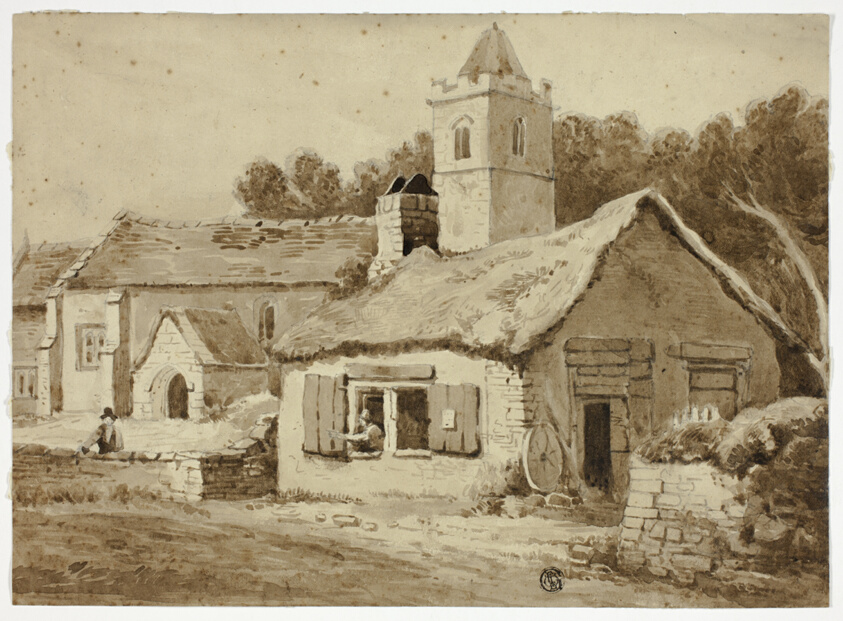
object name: Drawing and Watercolor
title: Village Church and Street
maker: After Samuel Prout; English, 1783-1852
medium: Brush and brown wash, with graphite, on tan wove paper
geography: England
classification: ink or chalk wash; drawings (visual works); prints and drawing